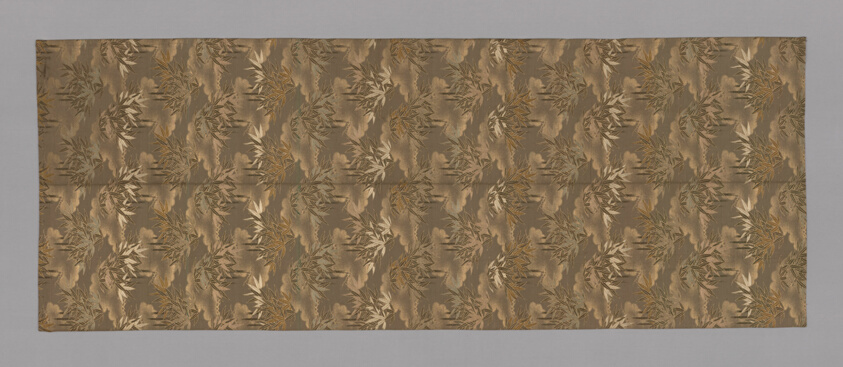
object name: Textile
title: Obi (Belt)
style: Japanism, late edo, meiji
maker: Japan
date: 18th/19th century, late Edo period (1789–1868)/ Meiji period (1868–1912)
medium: Design of the tops of bamboo trees in alternate directions, interspersed with cloudlike pine branches worked in gold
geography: Japan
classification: textile; weaving; obi (sash)